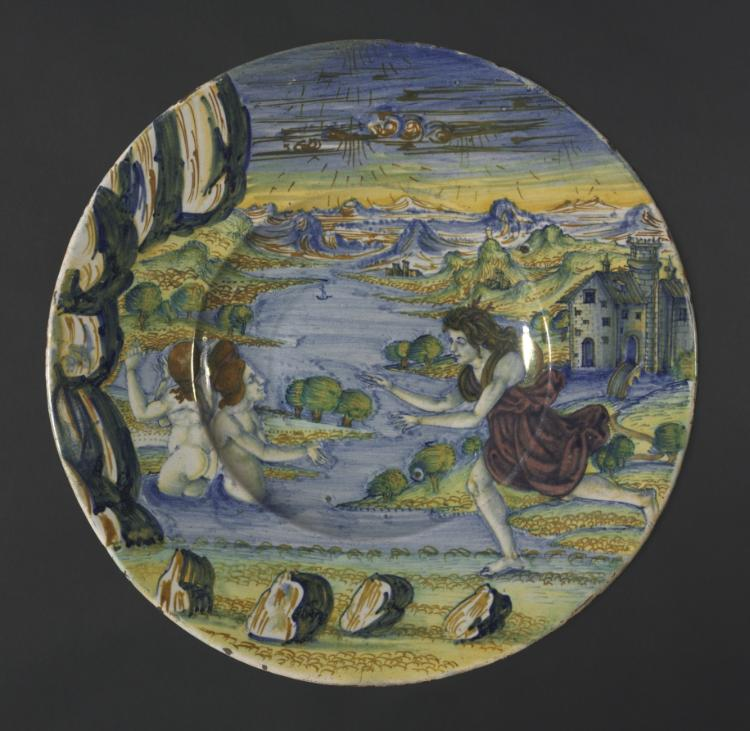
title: Plate: Diana and Acteon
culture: Italy, Gubbio, 16th century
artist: Maestro Giorgio Andreoli (Italian, 1465?–1553)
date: 1522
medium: tin-glazed earthenware with gold and red lustre (maiolica)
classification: Ceramic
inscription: signed: Mo Go 1522.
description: Alfred Pringsheim was a German Jewish collector. During Kristallnacht, in November 1938, the SS seized Pringsheim's maiolica collection from his home in Munich. It was stored in the annex to the Bayerishches National Museum, Munich. In March 1939, the German Ministry of Trade authorized export of Pringsheim's maiolica collection to London for auction at Sotheby's, provided that 80% of the proceeds up to £20,000 and 70% of the remainder be paid to the German Gold Discount Bank in foreign currency. Pringsheim was to receive the remaining proceeds. In exchange, Pringsheim and his wife were allowed to emigrate to Switzerland. After the war, the Pringsheim heirs received restitution of the sale proceeds paid to the Reichsbank.